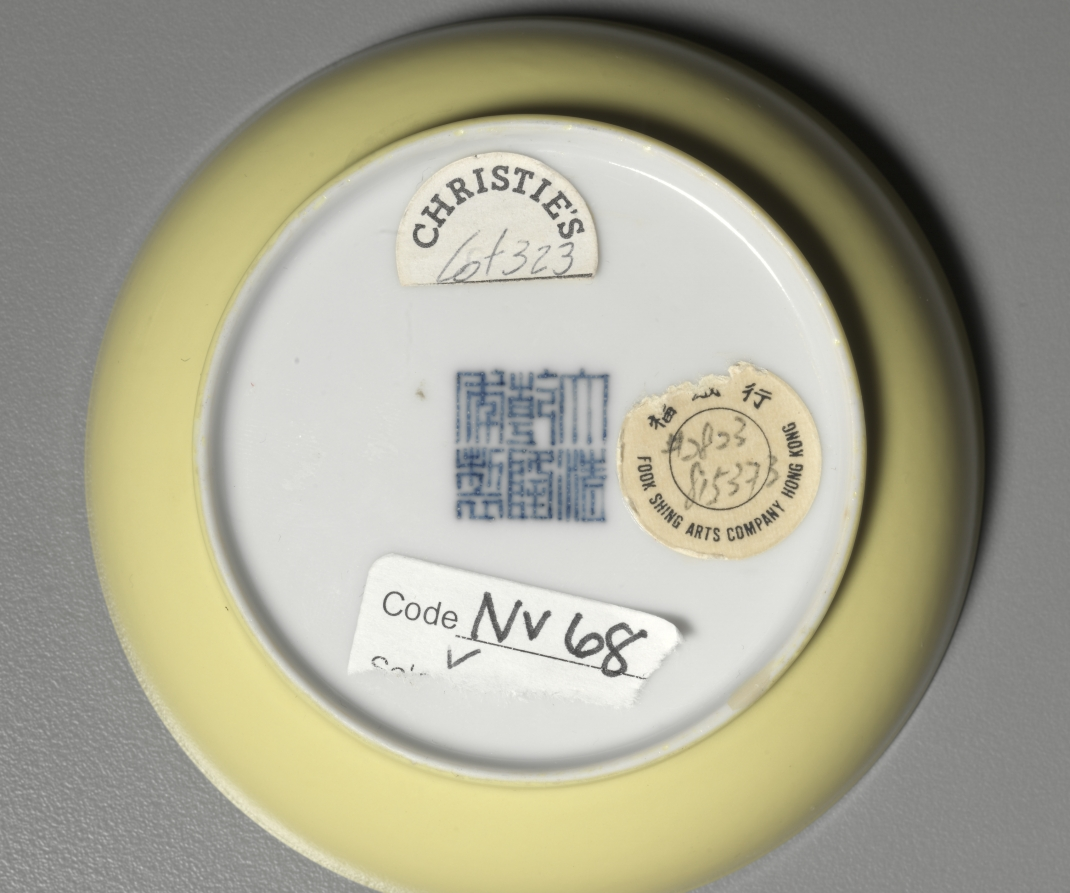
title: Small Dish with Yellow Enamel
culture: China, Qing dynasty (1644-1911), Qianlong mark and reign (1735-1795)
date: 1736–95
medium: enameled porcelain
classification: Ceramic